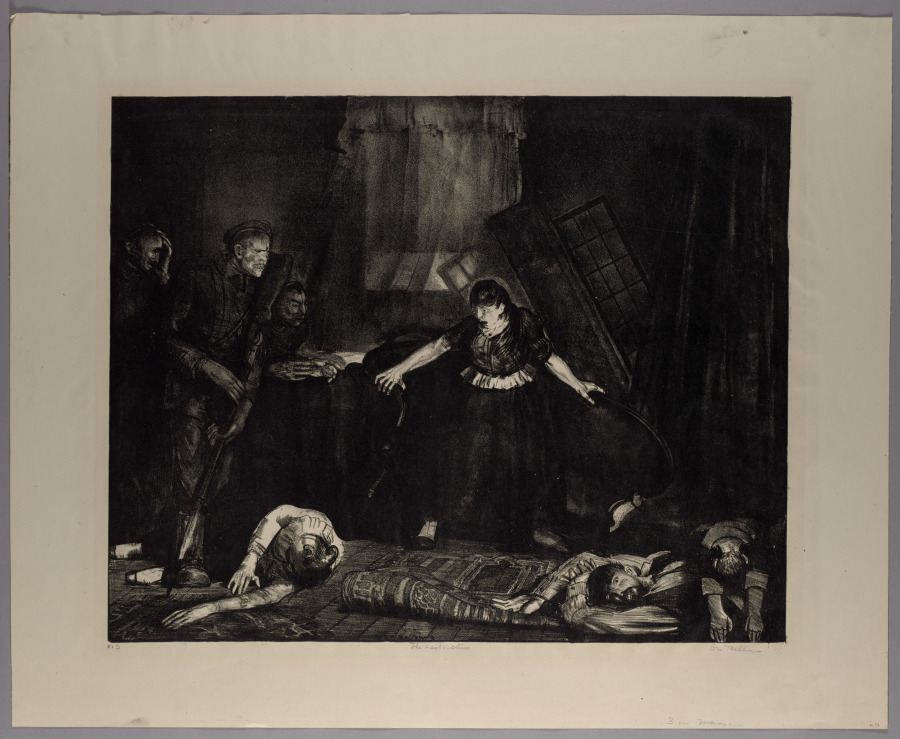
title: War Series: The Last Victim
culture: America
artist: George Bellows (American, 1882–1925)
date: 1918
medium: lithograph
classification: Print